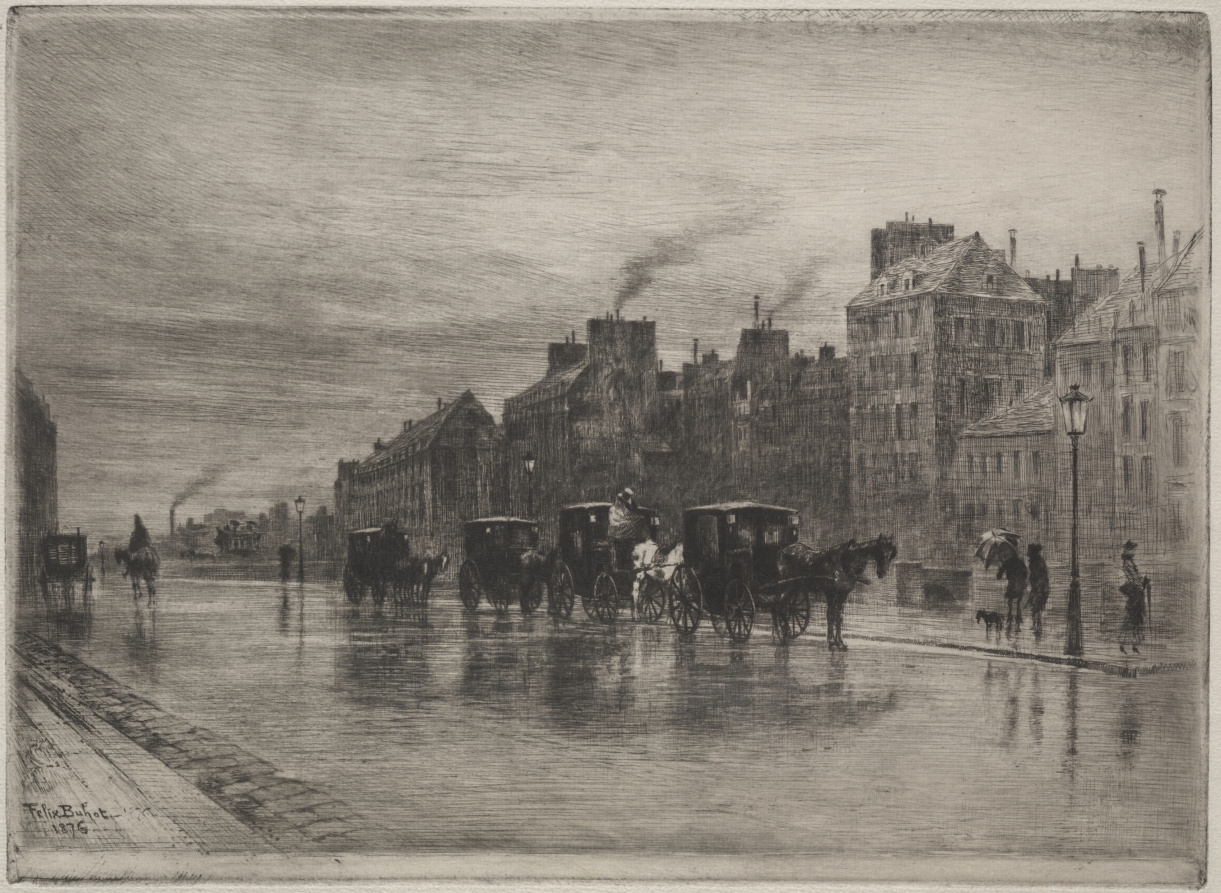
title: A Winter Morning on the Quai de L'Hotel-Dieu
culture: France, 19th century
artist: Félix Hilaire Buhot (French, 1847–1898)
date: 1876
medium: etching, drypoint, roulette and aquatint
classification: Print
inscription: signed and dated, lower left, in plate: "Felix Buhot 1876"; signed and inscribed, lower right, in graphite: "epreuve d'essai du 3e etat (avant la lettre à la pareil [?]) (retroussée) Felix Buhot"